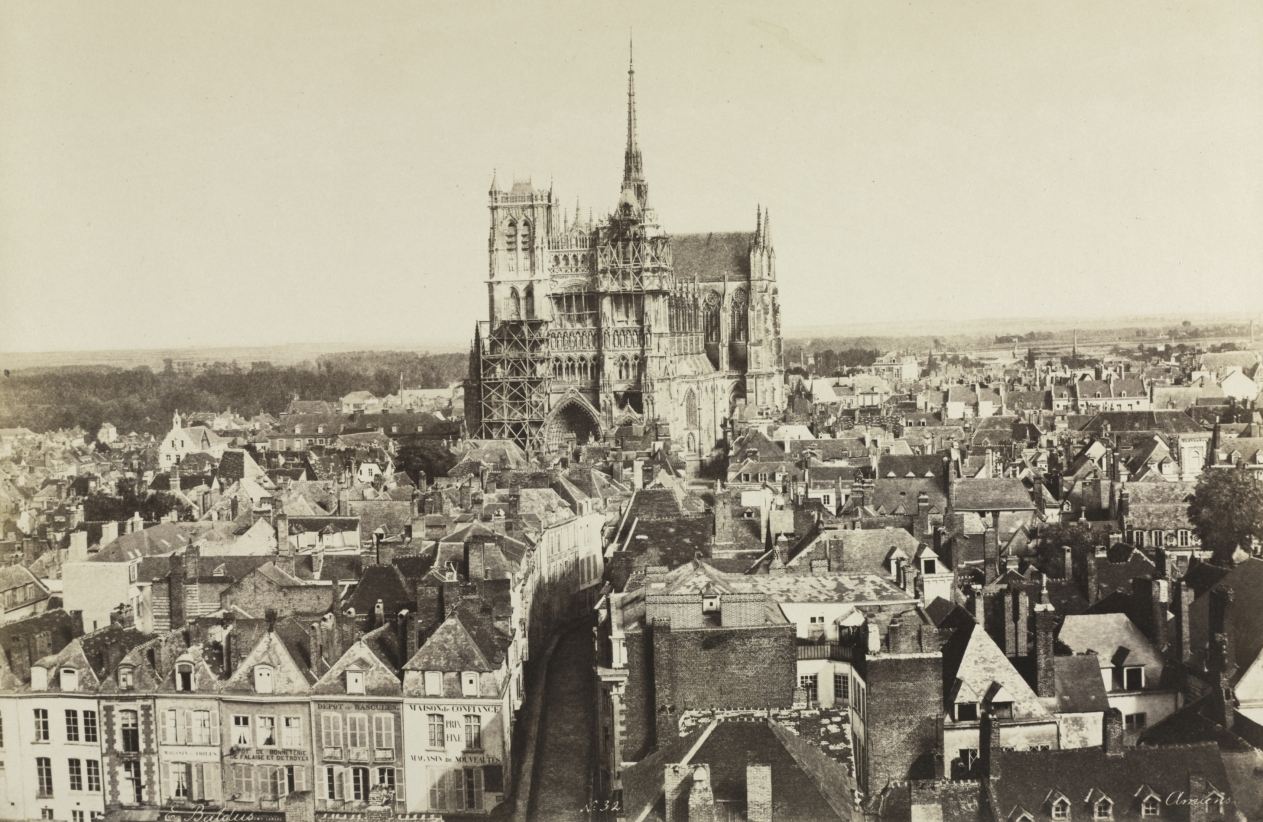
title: Amiens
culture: France, 19th century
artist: Édouard Baldus (French, 1813–1889)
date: 1855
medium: albumen print from wet collodion negative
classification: Photograph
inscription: Written in negative: "E. Baldus. N:32. Amiens"; in black ink: "E. Baldus [signed]; in pencil: "CI"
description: This rare, majestic, and sweeping view of the cathedral of Amiens, France, is an outstanding example of Baldus’s genius for photographing architecture. Placing his large view camera at an elevated vantage point, he recorded the dominating and central position of the church, which was undergoing restoration, as it towered above the surrounding village; open landscape is captured in the distance. In this ambitious composition, he carefully rendered the scene’s textural detail, spatial complexity, and subtlety of light. Compare this distant view with the close-up detail of a stone sculpture in LeSecq’s photograph of the same building (CMA 1996.253).